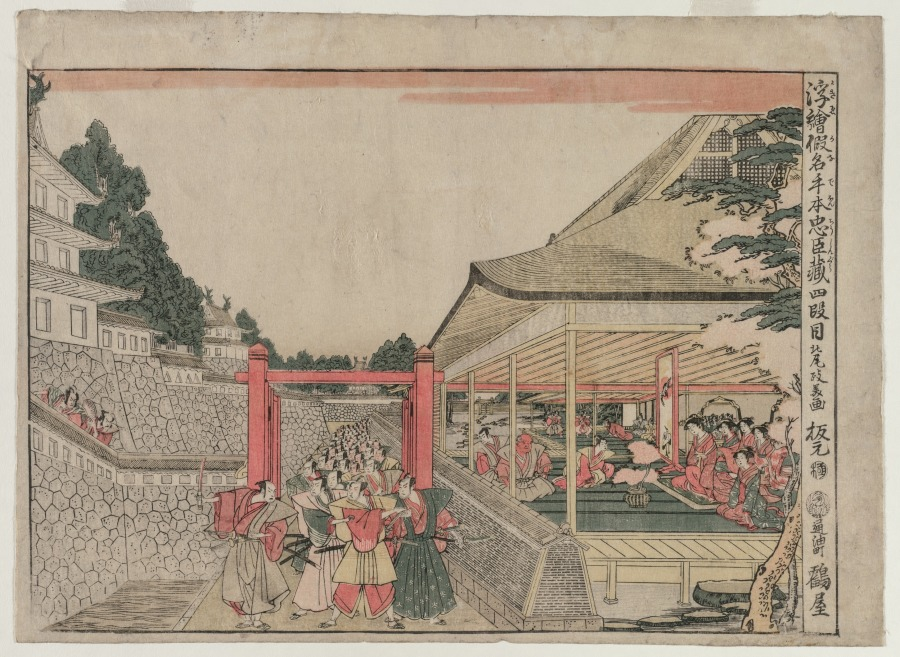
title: Chushingura: Act IV (from the series Perspective Pictures for The Treasure House of Loyalty)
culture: Japan, Edo period (1615–1868)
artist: Kitao Masayoshi (Japanese, 1764–1824)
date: c. 1790s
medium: color woodblock print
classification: Print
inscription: Signature: Kitao Masayoshi ga Publisher: Tsuruya Kiemon (hammoto Toriaburacho Tsuruya, emblem) Censorship Seal: kiwame